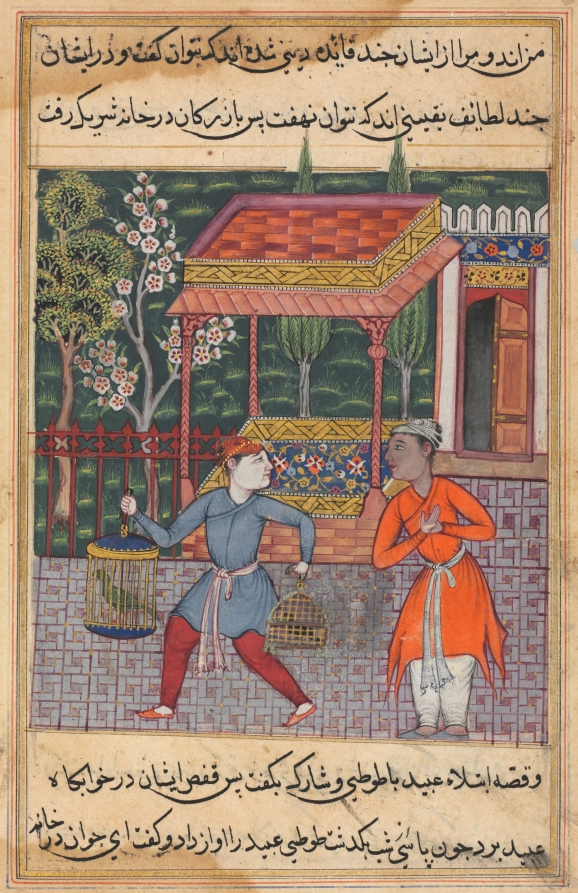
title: The merchant of Tirmiz takes the wise parrot and myna to ‘Ubaid, from a Tuti-nama (Tales of a Parrot): Forty-second Night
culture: Mughal India, court of Akbar (reigned 1556–1605)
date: c. 1560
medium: gum tempera, ink, and gold on paper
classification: Painting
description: The merchant of Tirmiz hurries home with a parrot’s cage clutched in his right hand and a myna bird’s in his left. His friend, dressed in orange, has suggested that these wise birds can offer advice to the merchant’s son, ‘Ubaid, who has becomes excessively infatuated with his wife.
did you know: Tirmiz, a city in modern-day Uzbekistan, is situated along the Amu-Darya river in Central Asia.